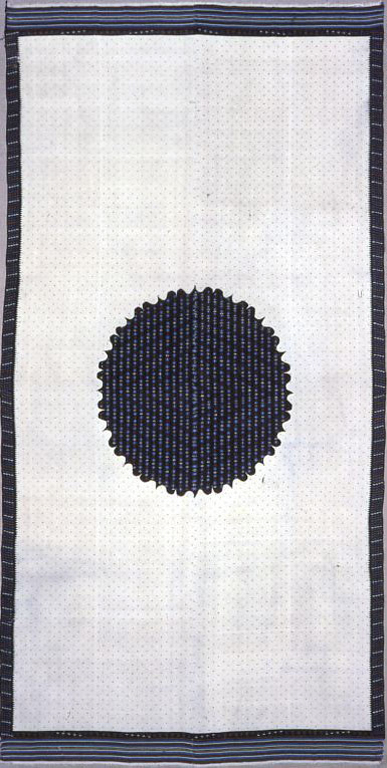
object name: Textile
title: Sarape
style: Folk Art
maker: Mexico, possibly Saltillo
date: 1850/1900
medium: Cotton and wool, single dovetail tapestry weave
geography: Mexico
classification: textile; weaving